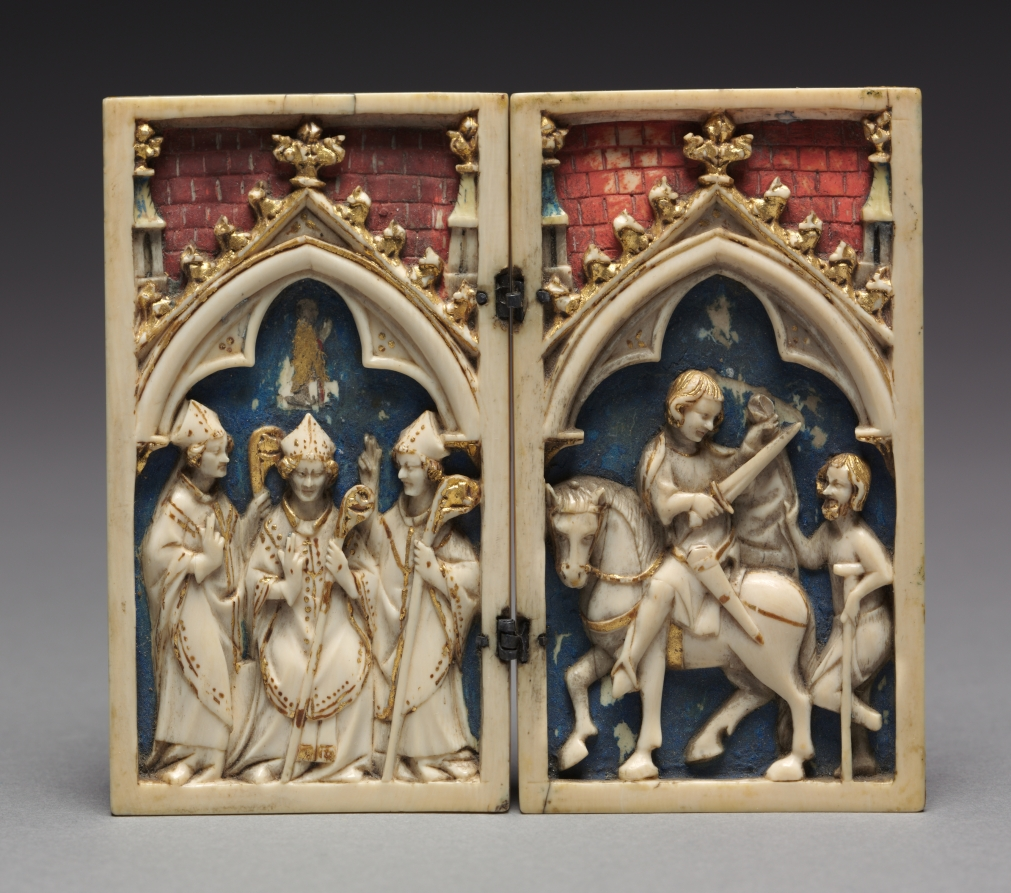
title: Diptych with Scenes from the Life of Saint Martin of Tours: The Consecration of Saint Martin as Bishop (left); Saint Martin Shares his Cloak with a Beggar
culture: Germany, Cologne, 14th century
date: 1340–1350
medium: ivory with polychromy and gilding, original silver hinges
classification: Ivory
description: This beautiful and well-preserved diptych includes its original polychromy, gilding, and silver hinges, though these are no longer connected. With its lapis background, red roof tiles, and gilded details of the figures’ clothing, the appearance is one of luxuriousness. The diptych provides us with a rare and vivid impression of how such devotional ivories were originally decorated in the 1300s.